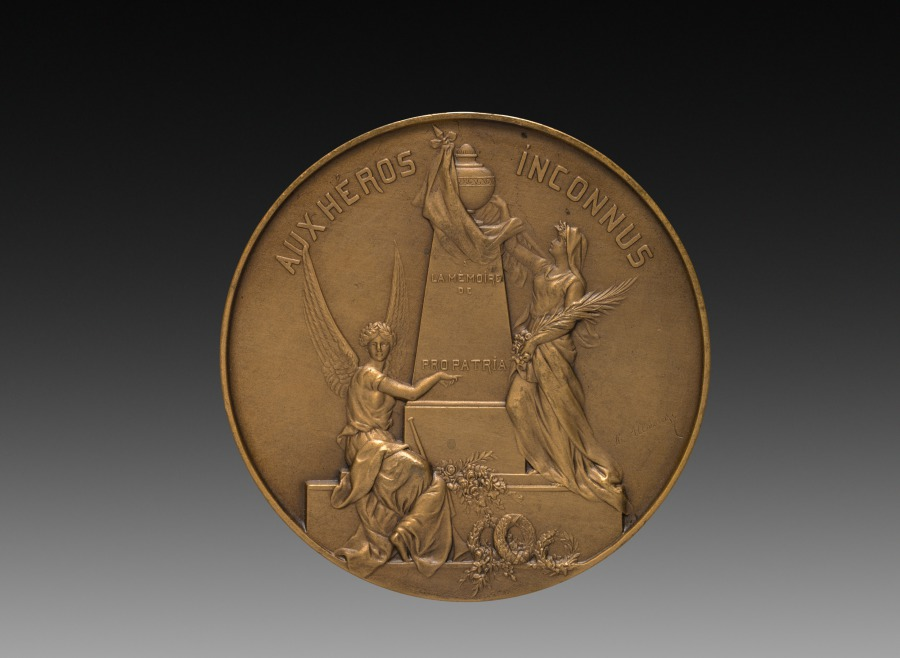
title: Medallion (reverse)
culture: France, 19th-20th century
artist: Henri Emile Allouard (French, 1844–1929)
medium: bronze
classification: Metalwork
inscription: "Pour la France. Pour l'humanité."